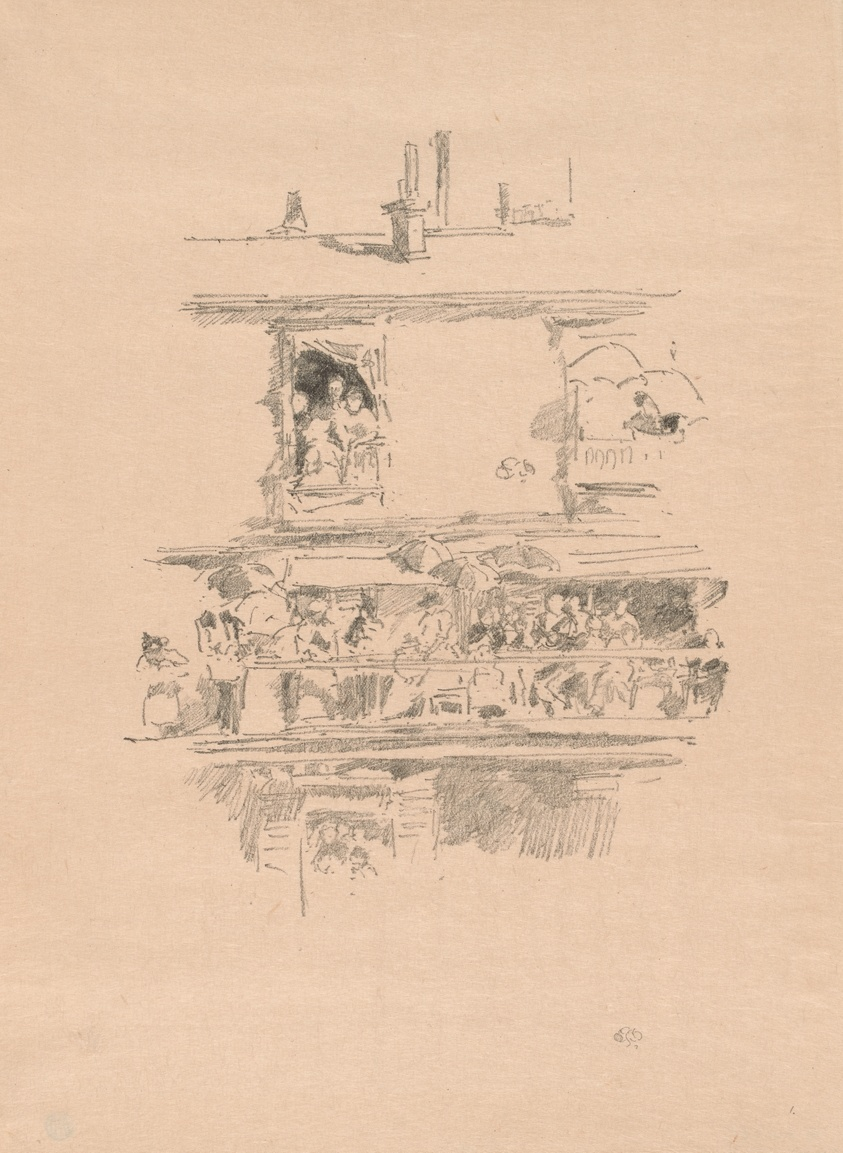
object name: Print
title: The Long Balcony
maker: James McNeill Whistler (American, 1834-1903)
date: 1894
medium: Transfer lithograph in black on cream laid Japanese vellum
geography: United States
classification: transfer lithograph; lithograph; print; prints and drawing